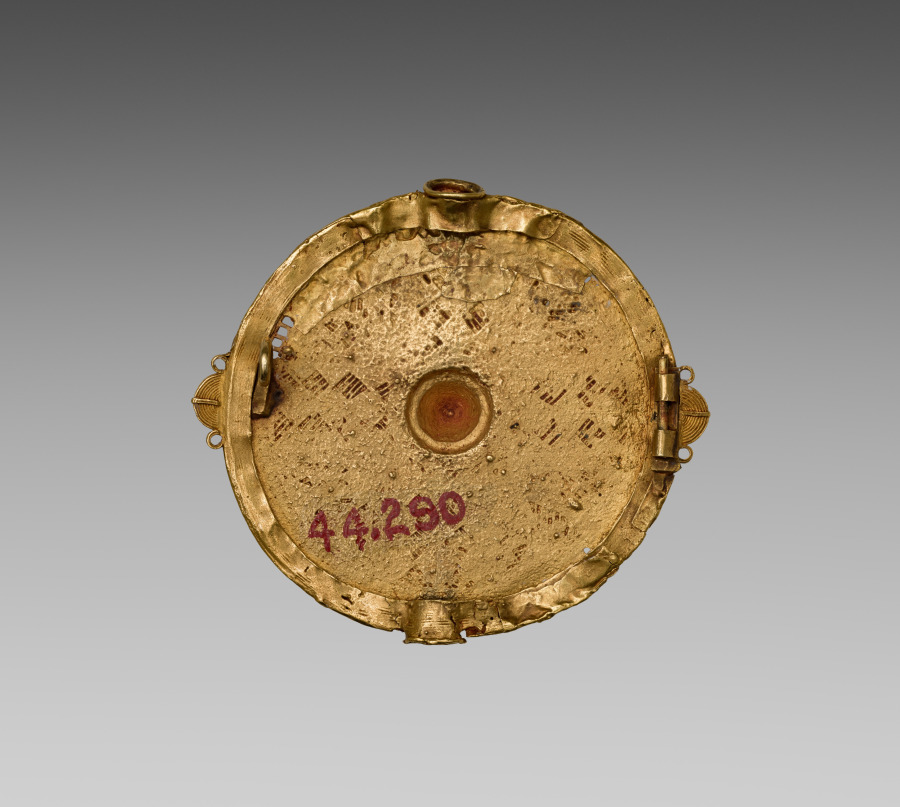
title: Disk Pendant (akrafokɔnmu)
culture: Africa, West Africa, Ghana, Asante Empire/ Kingdom, member of the goldsmiths’ guild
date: 1800s, before 1871; pin added later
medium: Gold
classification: Jewelry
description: Gold discs dangling on the chests of Akan state officials and elites showed their rank and duties. Worn by these akrafo (“soul people”) since the 1800s, they are often linked to kradware, officials who represent and purify (“wash”) the king’s soul. To make them, goldsmiths cast or flattened gold. Muslim North African gold coins likely inspired their form and material, while concentric water rings influenced their composition. This small disc is a typical pre-colonial example. Gold ornament making ceased until 1924; court officials now wear large discs.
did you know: An 1886 letter indicates that the English doctor Harry T. Reilly received this disk as a gift from three Asante chiefs for providing them with medical care while they were imprisoned in Cape Coast Castle in the aftermath of the Second Anglo-Ashanti war (1863-64).